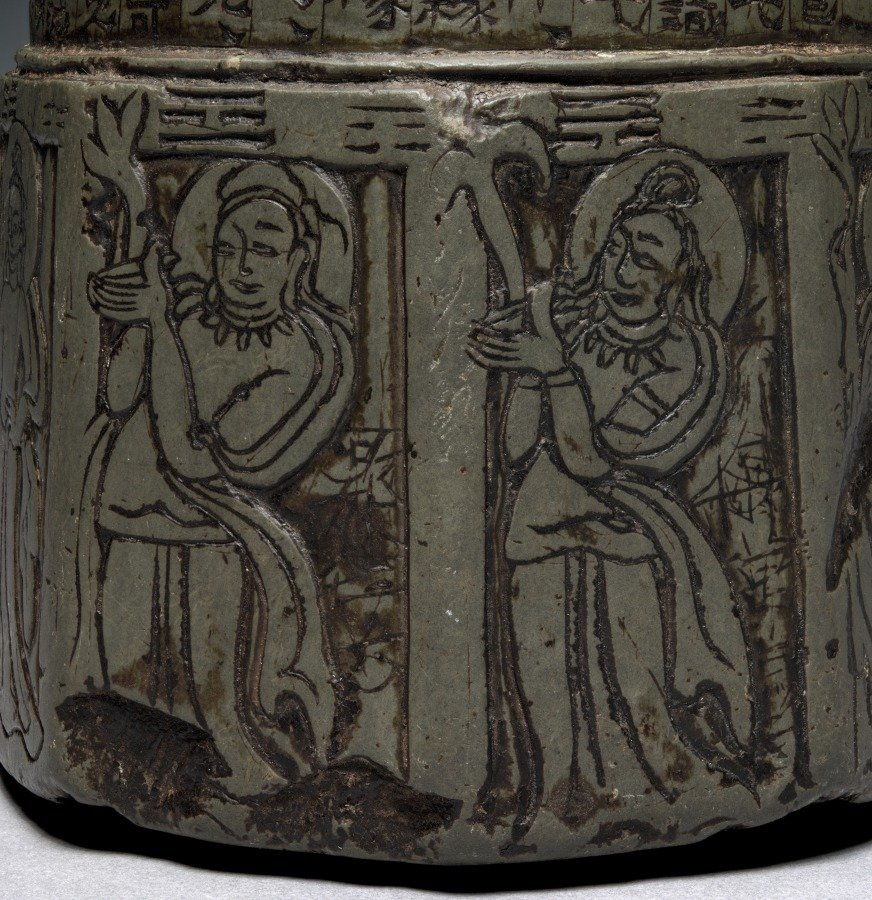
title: Miniature Votive Stupa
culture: China, Gansu province, Northern Wei dynasty (386-534)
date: 435 CE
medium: steatite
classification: Sculpture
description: This sutra pillar, inscribed with a sacred Buddhist text, belongs to a group of miniature stupas (jingta) that were found exclusively in the Gansu corridor, Northwest China. Ranging in date between AD 426–36, some of them bear the names of the lay Buddhist donors who commissioned them. A stupa is an architectural round structure built for the veneration of Buddhist relics. Miniature stupas may have commemorated the visit of a sacred site or represented donations to religious communities and sites.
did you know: There are trigrams, three horizontal lines, broken or continuous, above each of the eight bodhisattvas in the stupa's lower section.